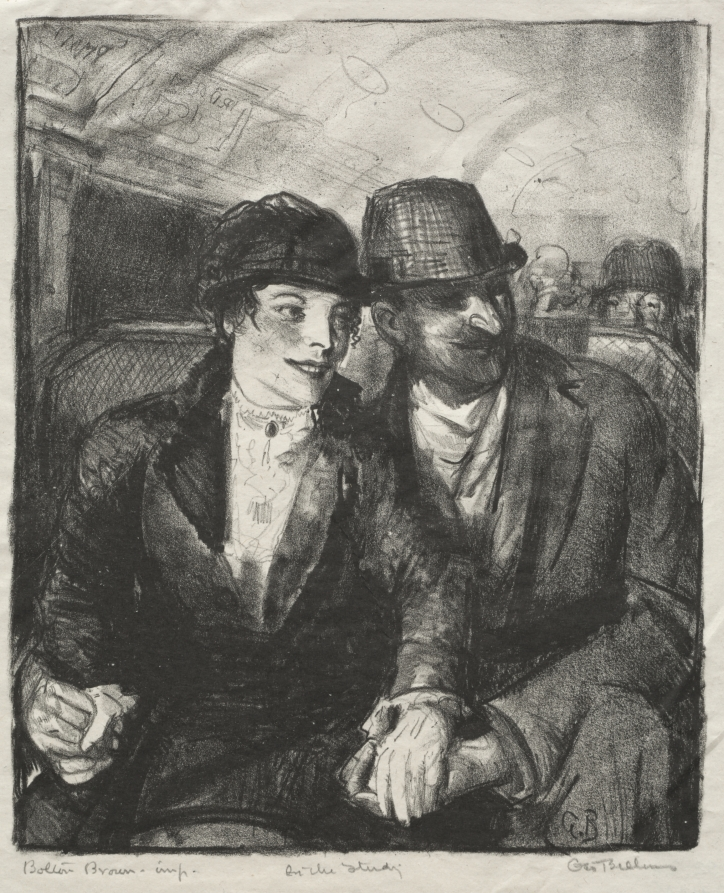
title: In the Subway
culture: America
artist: George Bellows (American, 1882–1925)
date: 1921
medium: lithograph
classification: Print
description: Public transportation offered one of the various forms of entertainment to be had in the city: people watching. Here, George Bellows captured an amorous couple in a jolly mood who smile across the aisle at other travelers on a night out. The first subway line in New York City, from City Hall in lower Manhattan to Harlem, opened in 1904. By 1920, there were three lines covering the city’s outer boroughs and both sides of Manhattan. For five cents each, couples could go almost anywhere in the city for a night out on the town.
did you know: The somewhat old-fashioned clothing of this couple by 1920s New York standards suggests that they may be recent immigrants to the city from Europe.